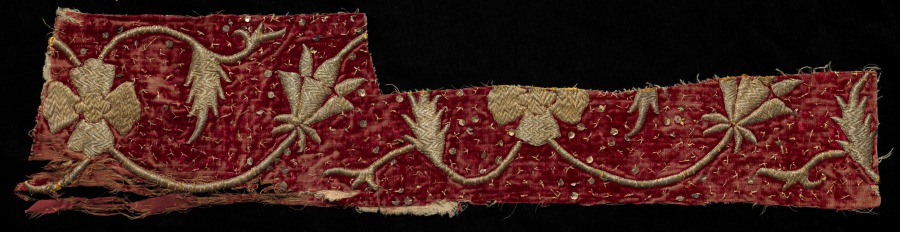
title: Fragment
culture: India, Jaipur, 19th century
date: 1800s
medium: embroidery; silk and gold filé on silk velvet ground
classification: Velvet